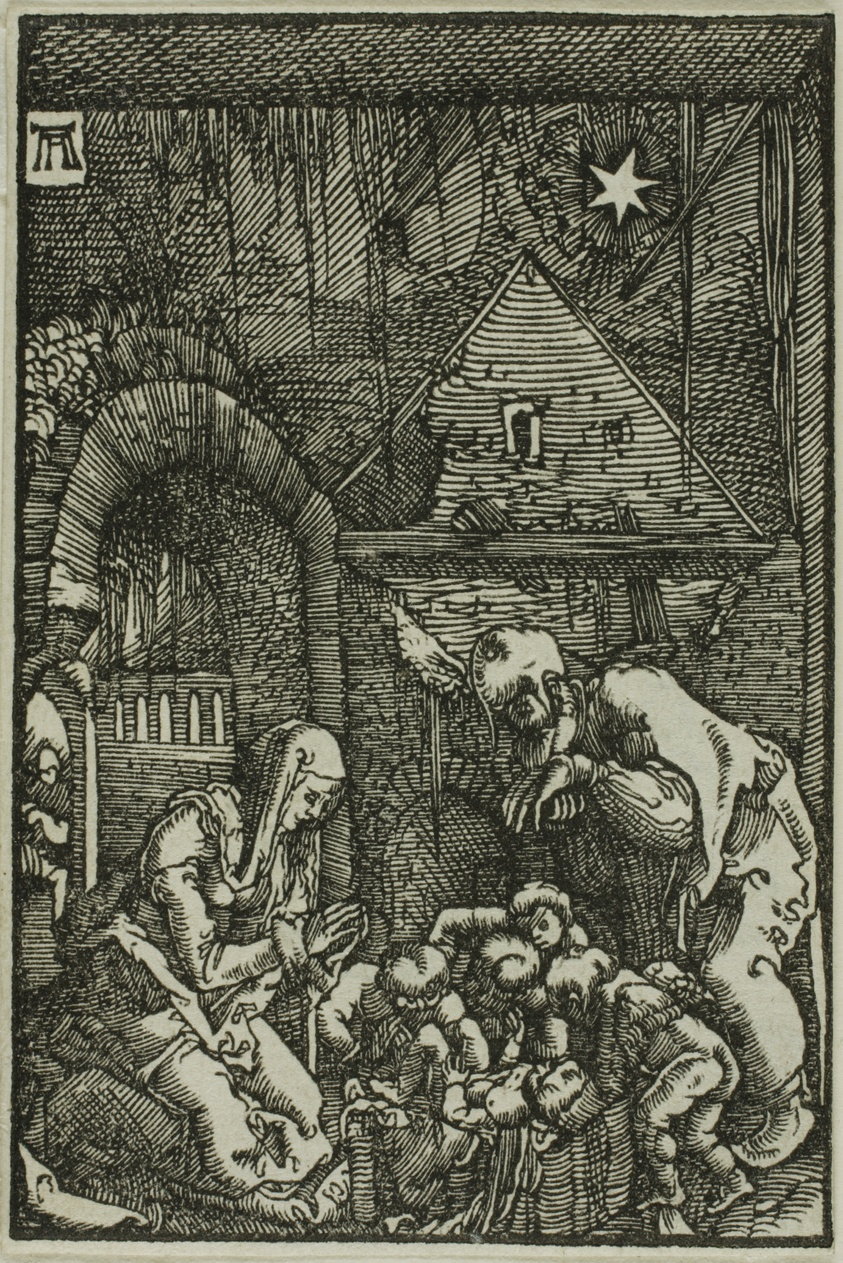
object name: Print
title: The Nativity, from The Fall and Redemption of Man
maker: Albrecht Altdorfer (German, c.1480-1538)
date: 1513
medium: Woodcut in black on ivory laid paper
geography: Germany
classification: wood engraving; print; prints and drawing